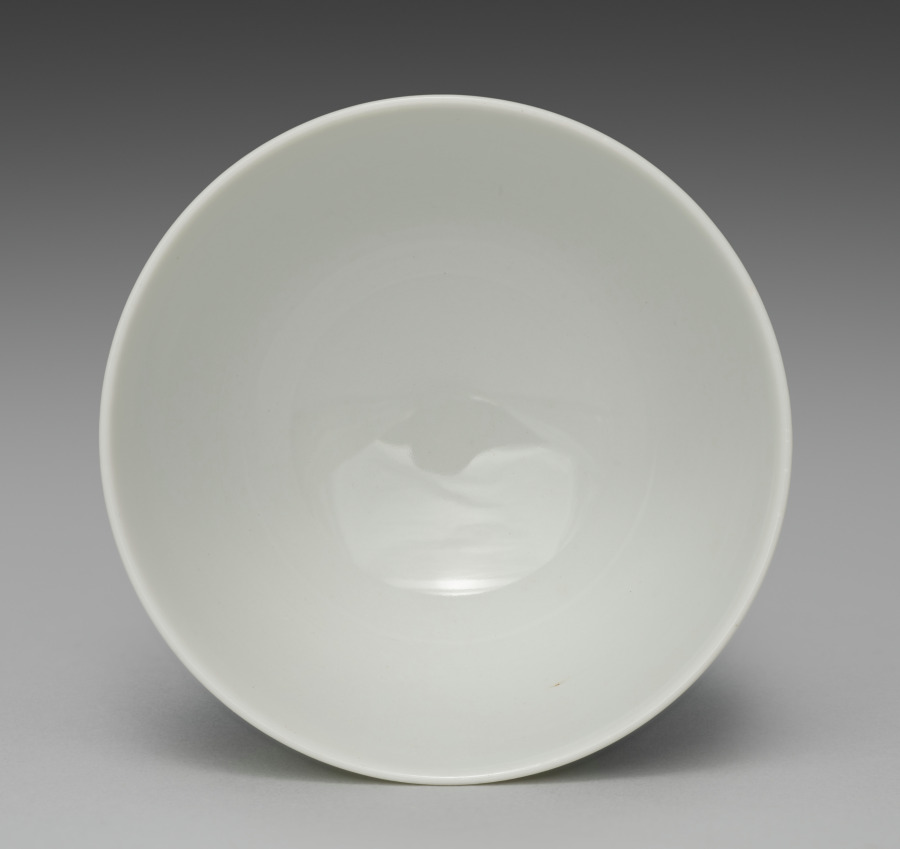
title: Teacup from Tea Set with Orchids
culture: Japan, Meiji period (1868–1912)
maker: Seifū Yohei III (Japanese, 1851–1914)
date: c. 1893–1914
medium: Porcelain with underglaze blue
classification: Ceramic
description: Although the teapot here is stored in a separate box from the five cups, these six pieces may once have been part of a tea set that included other tools such as a water cooler. The teacups have orchid flowers on both sides in underglaze blue, as well as a blue band inside the footring. The teapot has the same design and a blue band painted around the bottom of the lid’s knob. The cups’ long wood storage box is stamped on the exterior, over the lid and base, with a small red seal reading “Satō.” The same seal appears on five small squares of yellow textile, one placed in the bottom of each compartment in the teacup storage box. These are additional to the customary yellow cloths stamped with a “Seifu” seal. Interestingly, four of the Seifū cloths are stamped with an ovoid seal, while the remaining cloth, which is a slightly lighter color, has an unusual seal that is not quite gourd-shaped and with the fū of Seifū in a stylized, unrecognizable form. The teapot has its own box with a Satō seal and is wrapped with an orange textile stamped with the same unusual Seifū seal. A set with a very similar surface design is in the Brooklyn Museum. The Brooklyn set has a water cooler and a small pitcher, in addition to the teapot and cups, and all are in a single storage box. This box records the tea tools as made with kanpakuji, or “bright-jewel white porcelain,” counted among Yohei III’s most important inventions, and carved images. In fact, both sets have a white surface much closer in coloration to the cool white of porcelain clay used in Kyoto at the time, and the designs are simply painted. The Brooklyn set was thus likely mismatched at some point with a box intended for another tea set. Nonetheless, the box may have helped prevent the set’s original components from being dispersed, and the set itself provides insight into how the other tools from the present set may have looked.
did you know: This tea set with orchids has a side-handled pot called a kyūsu, used for steeping, straining, and serving tea.